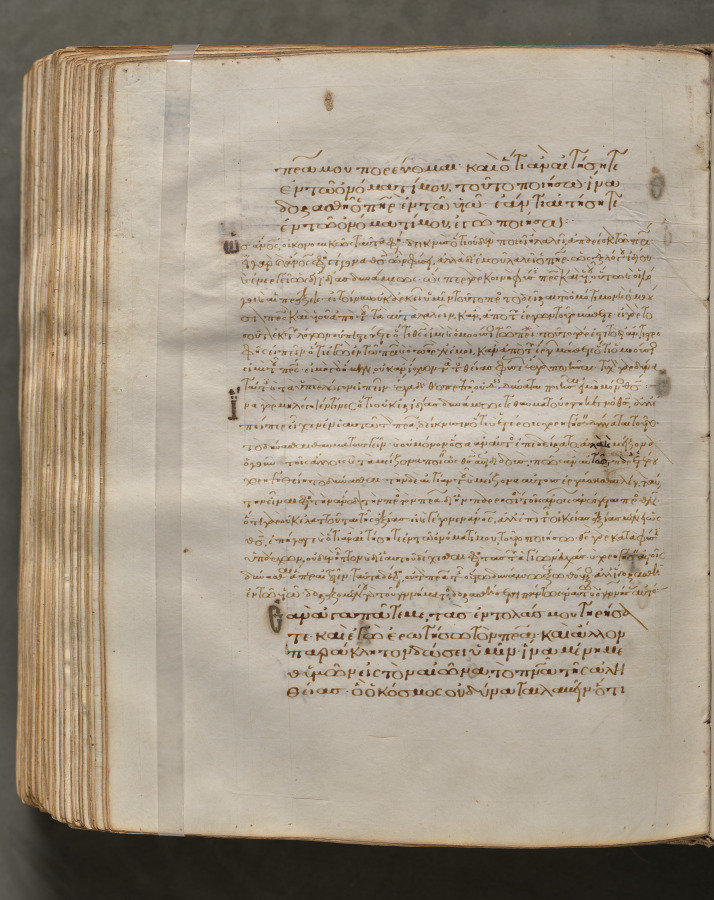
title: Text, folio 393 (verso), from a Gospel Book with Commentaries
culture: Byzantium, Constantinople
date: c. 1000–1100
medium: ink, tempera, and gold on vellum; leather binding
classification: Bound Volume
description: Each of the four gospels in this book opens on a page with brilliantly illuminated borders depicting the author of the text as well as birds—principally peacocks, symbols of the immortality of the soul—and fountains, representing the fountain of life and the salvation of the soul. This volume consists of 428 leaves with texts in Greek. Its level of sophistication suggests that it was probably written and decorated in a monastery in Constantinople.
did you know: Gospel books were carried in procession through Byzantine churches.